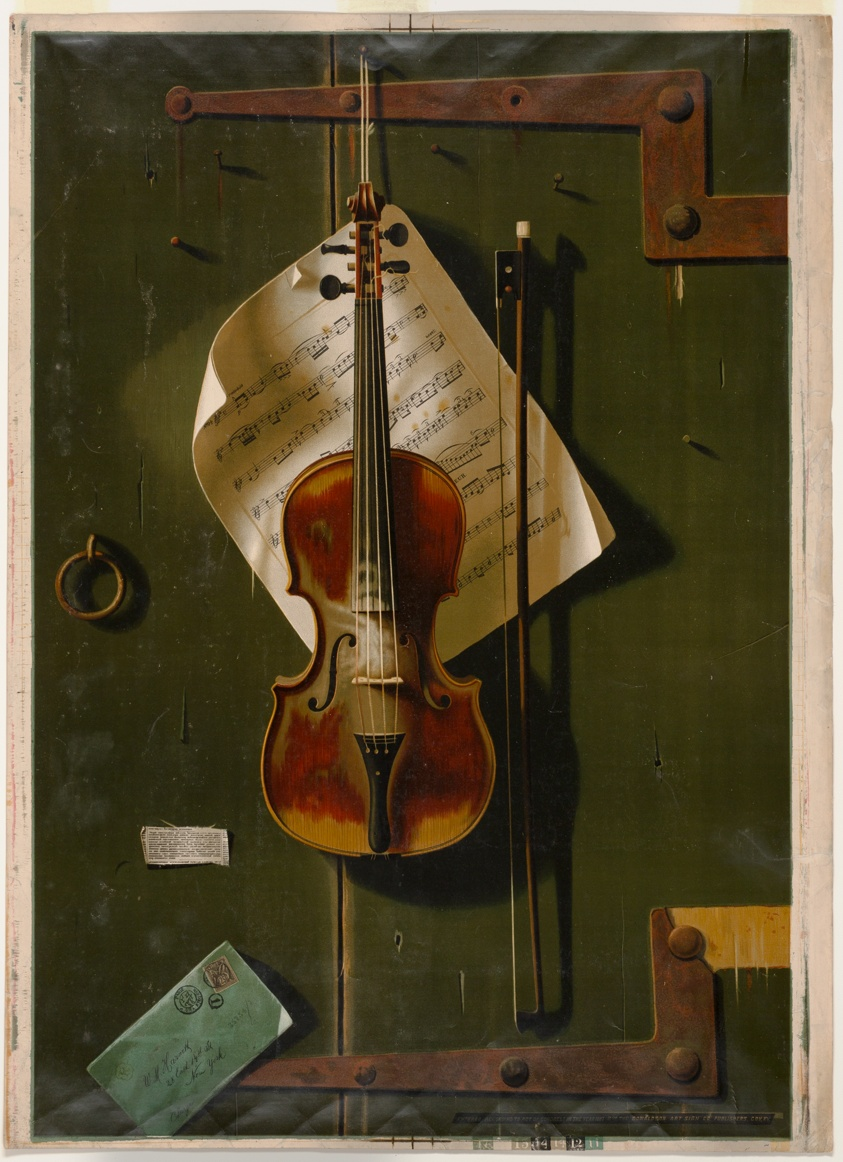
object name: Print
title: The Old Violin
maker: Unknown artist; after William M. Harnett (American, 1848-1892)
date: 1887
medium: Color lithograph on paper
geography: United States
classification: chromolithograph; print; prints and drawing